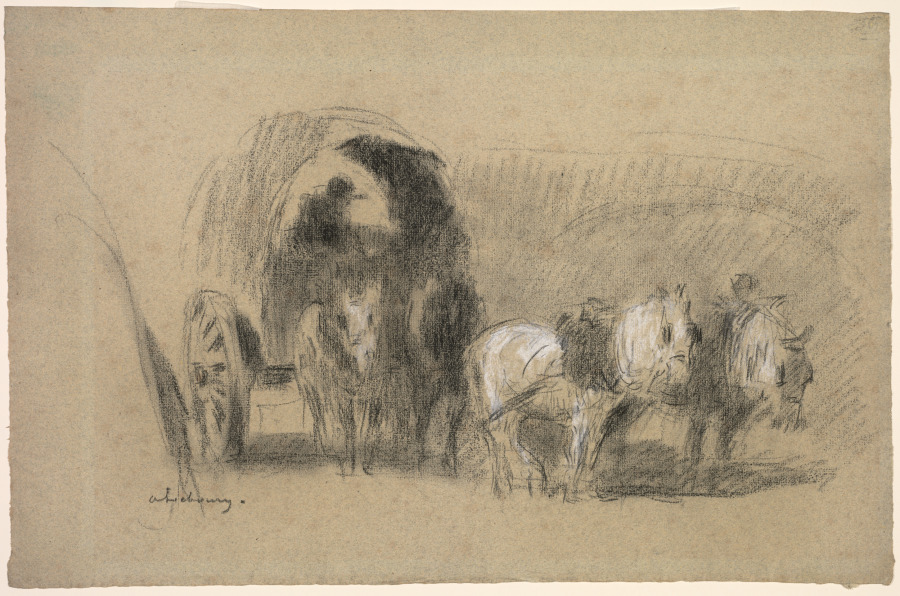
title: A Miller's Carriage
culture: France, 19th-20th century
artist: Albert-Charles Lebourg (French, 1849–1928)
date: c. 1895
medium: black and white chalk with stumping on beige wove paper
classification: Drawing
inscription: Verso: upper right in green ink: 80355 / circular estate stamp (Lugt 1664b)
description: Albert Rouen was known for his work in charcoal, the medium used for this drawing. It likely depicts a scene from his native Rouen, a port city in northern France. He examined the city and provincial life around it frequently in his works. Here, four horses pull a carriage before a bridge, likely along the banks of the Seine River.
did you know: Albert Lebourg was the leader of an artistic movement called the Rouen School for the fact that they worked independently and outside the Parisian art scene.